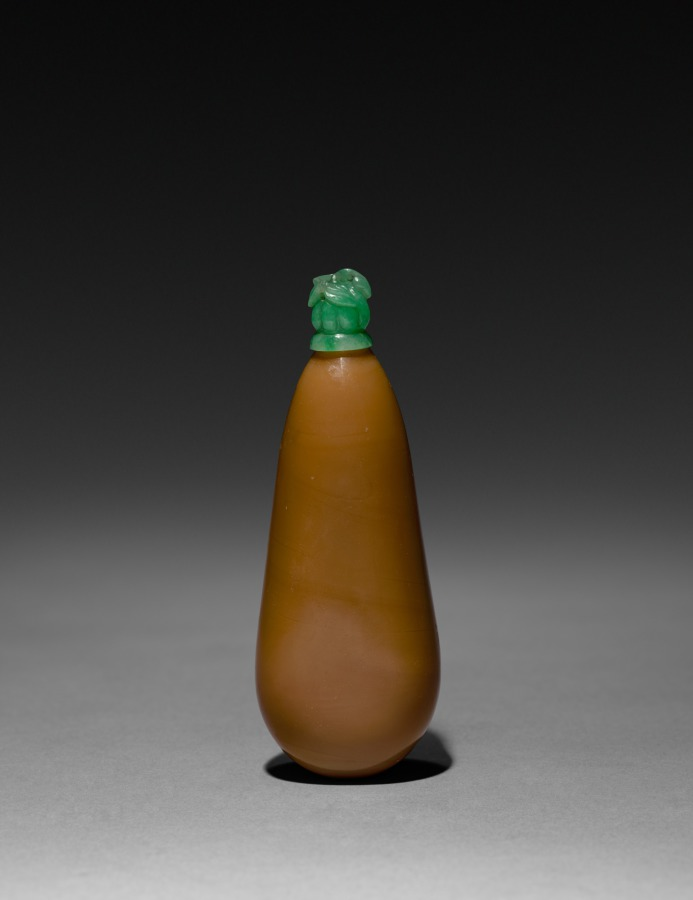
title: Snuff Bottle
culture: China, Qing dynasty (1644-1911)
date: 1644–1911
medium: glass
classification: Glass